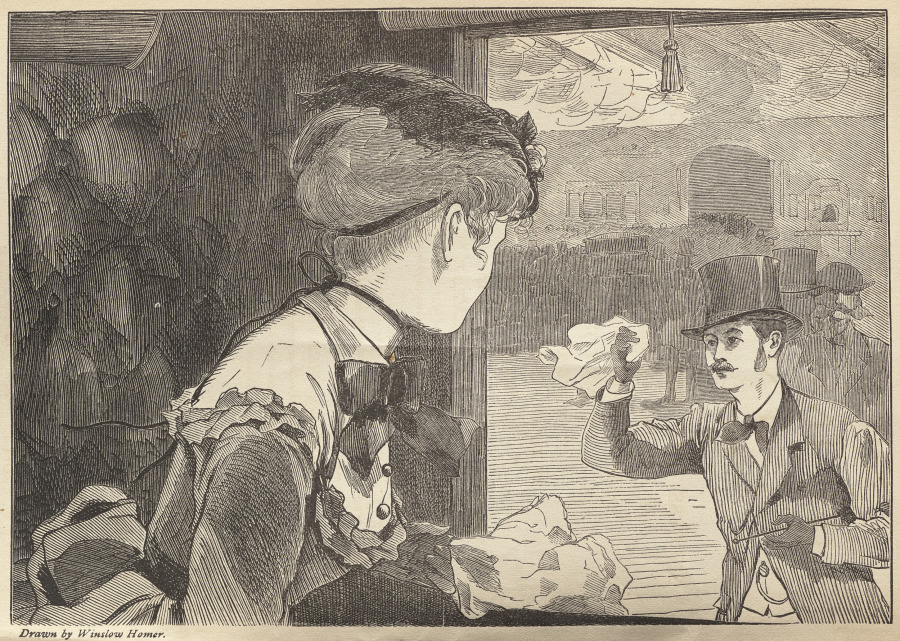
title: "Come!"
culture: America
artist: Winslow Homer (American, 1836–1910)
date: 1869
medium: wood engraving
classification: Print